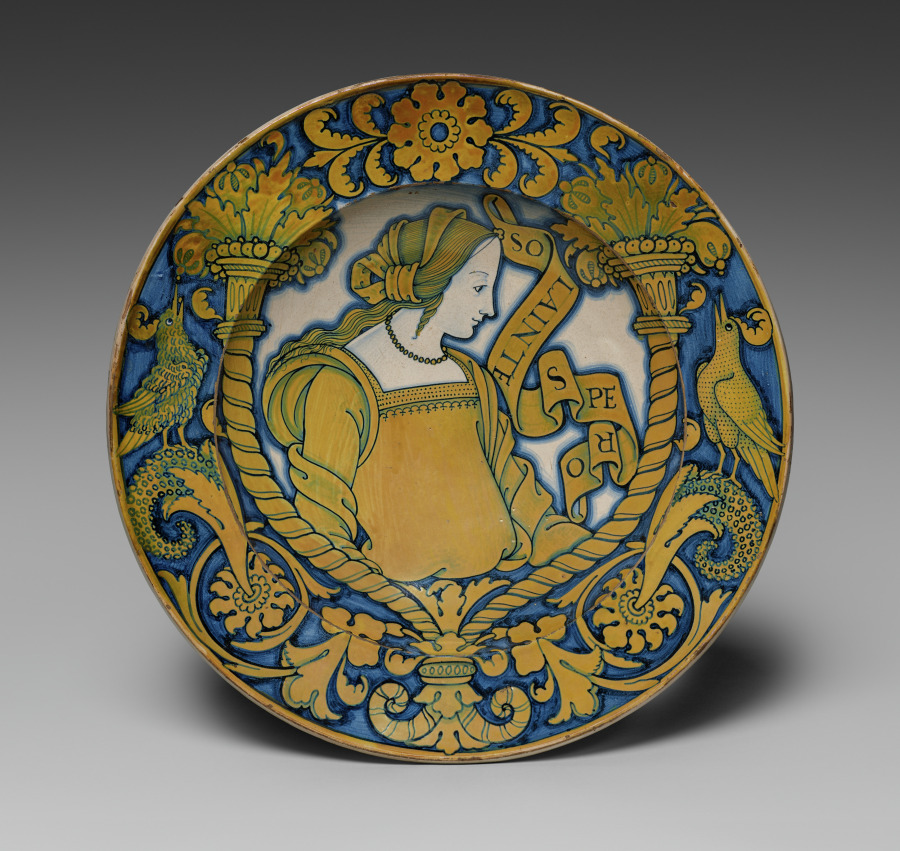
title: Plate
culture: Italy, Deruta, 16th century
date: c. 1520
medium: tin-glazed earthenware (maiolica)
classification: Ceramic